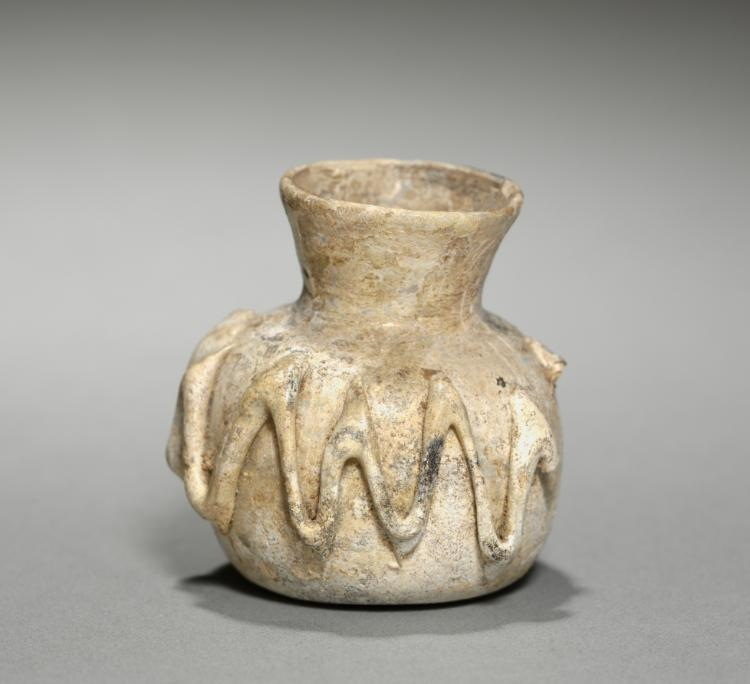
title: Vase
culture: Eastern Mediterranean, Roman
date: 200–500 CE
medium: glass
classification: Glass